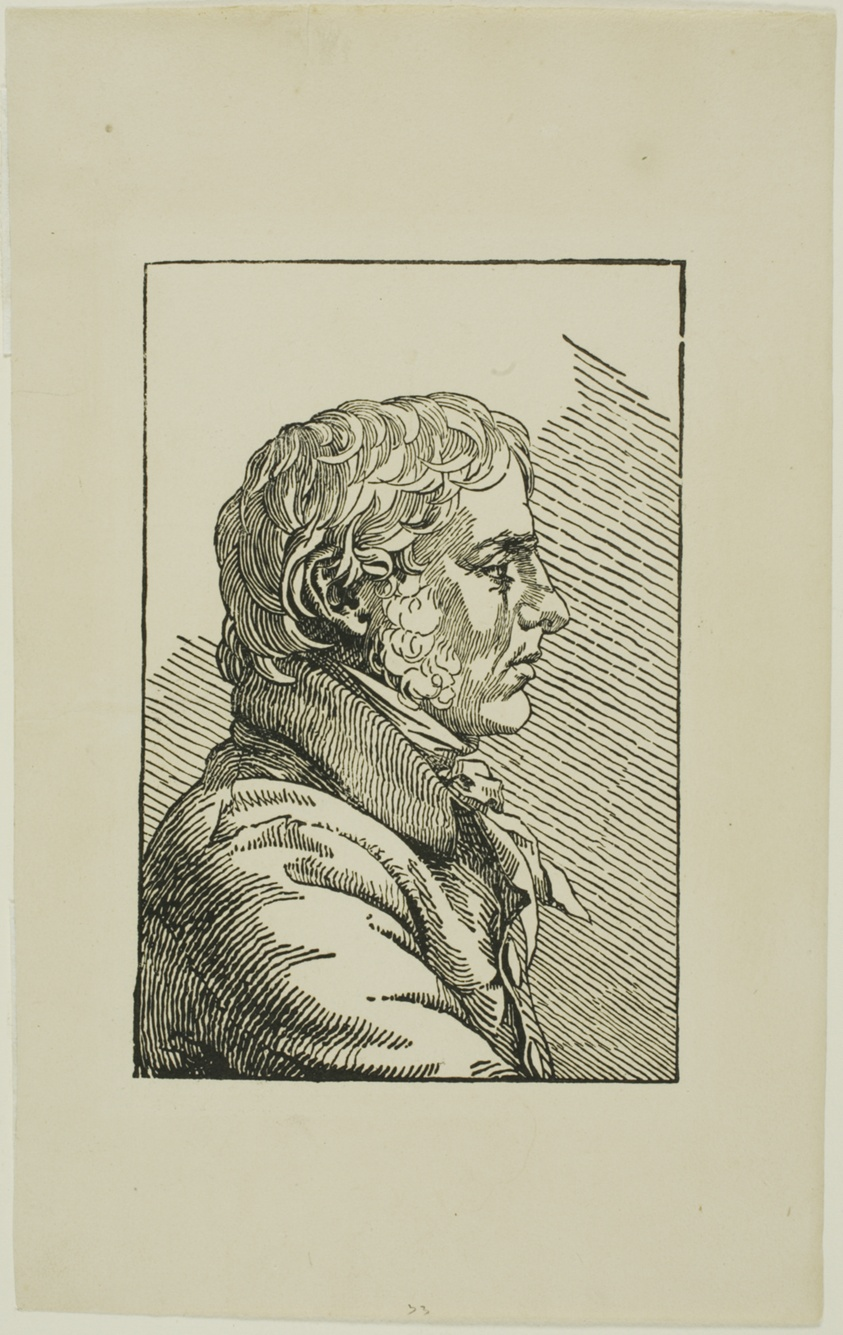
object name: Print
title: Self-Portrait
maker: Caspar David Friedrich (German, 1774-1840)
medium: Woodcut on paper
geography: Germany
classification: woodcut; print; prints and drawing